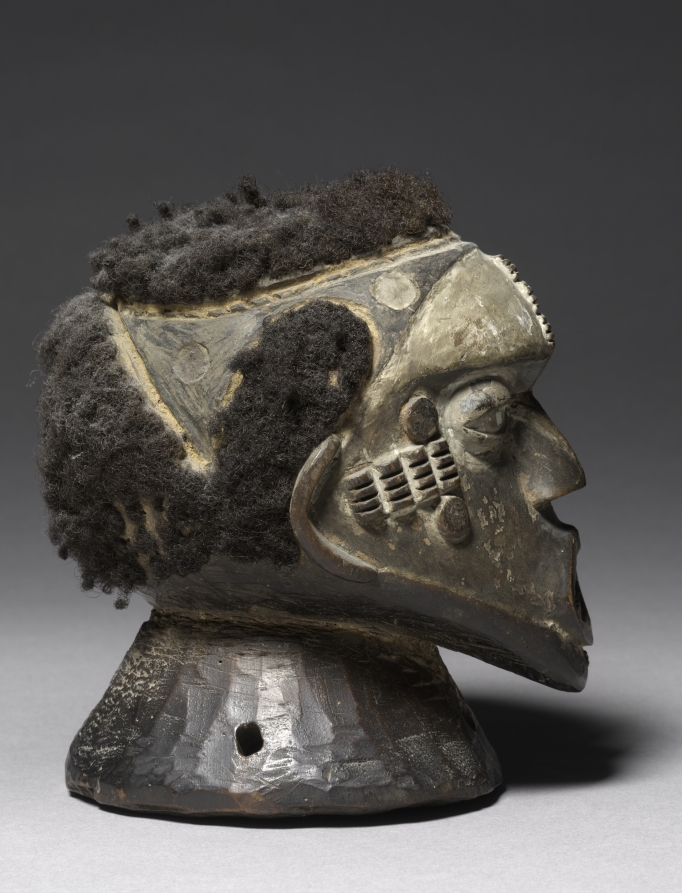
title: Headdress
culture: Africa, West Africa, Nigeria, Idoma-style carver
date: early 1900s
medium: Wood, human hair, paint, and possibly kaolin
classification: Mask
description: This was used in masked performances of the Agrinya society, a powerful guild formerly restricted to men who had killed an elephant, lion, or man. The white pigment connotes the realm of the ancestors, while the aggressive expression of the face seems to suggest the courage of Agrinya society members.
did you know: Holes in the neck once attached a flat raffia disk or strings for wearing the headdress-type mask on top of the head.